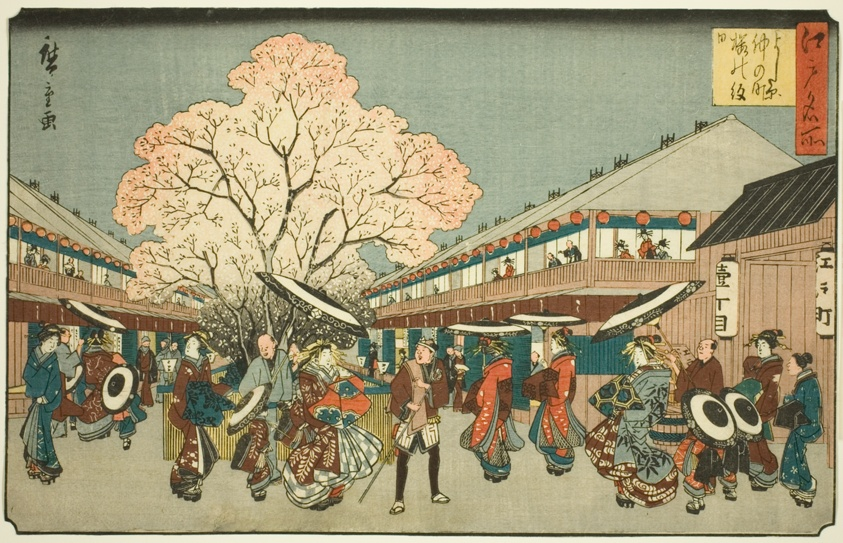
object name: Print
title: Cherry Blossom Day on the Nakanocho of the Yoshiwara (Yoshiwara Nakanocho Sakura no monbi), from the series "Famous Places in Edo (Edo meisho)"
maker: Utagawa Hiroshige 歌川 広重; Japanese, 1797-1858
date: c. 1840/58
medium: Color woodblock print; oban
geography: Japan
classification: woodblock print; print; asian art